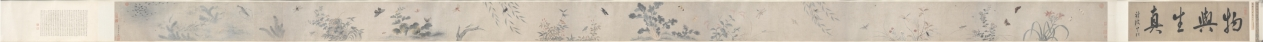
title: Insects and Flowers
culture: China, Qing dynasty (1644-1911) or Republican period (1912-49)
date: c. 1900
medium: Handscroll, ink and color on paper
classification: Painting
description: More than 26 feet long, this scroll presents insects, reptiles, and plants in delicate brushwork and pale colors, referring in style to earlier Southern Song dynasty (1127–1279) bird-and-flower paintings. Upon closer inspection, ants dismember a butterfly and reptiles wait to ambush their prey. An inscription at the end of the painting gives us an idea of its meaning: Attributed to the Qing dynasty scholar Zhang Xigeng (張錫庚, 1801–1861), the inscriber relates the work to an earlier painting by Qian Xuan (錢選, c. 1235–before 1307) and further suggests that the painting may allude to the relentlessness of natural selection. By drawing a parallel to tumultuous episodes in Chinese history, the writer might even hint at the domestic rebellions and the aggression of Western powers against China in his lifetime, particularly the Opium Wars (1839–60).